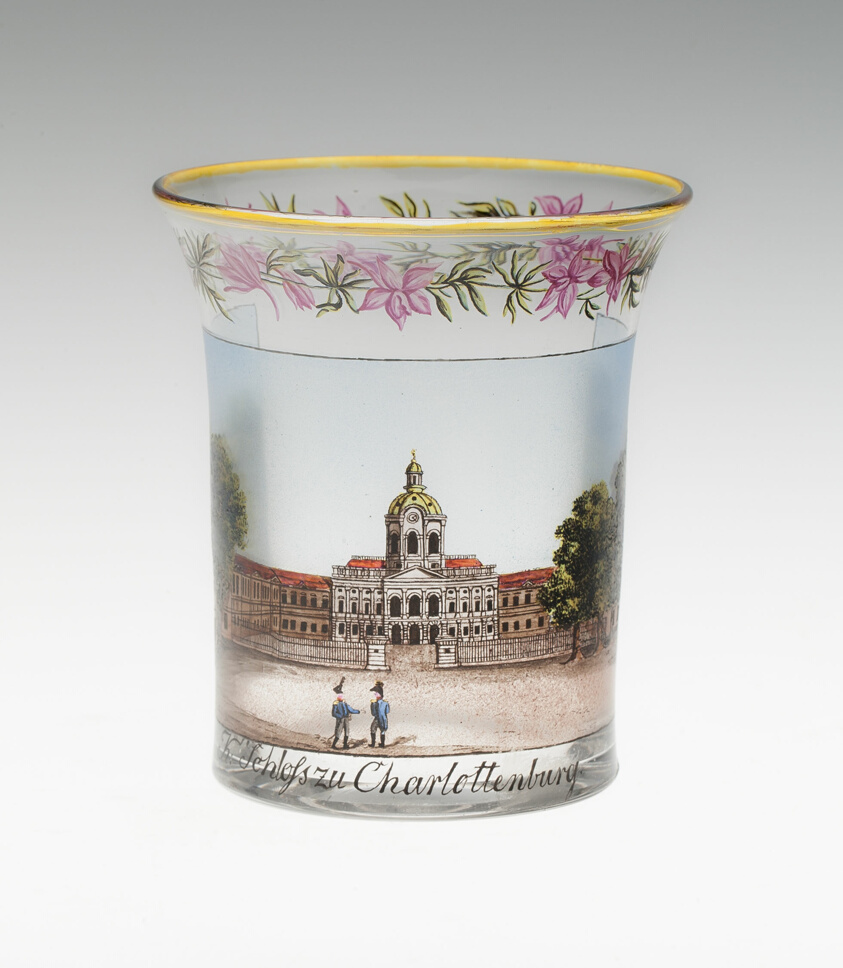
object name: Glass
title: Beaker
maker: Germany, Berlin or Dresden; Carl von Scheidt (German, 19th century)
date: 1816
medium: Glass; colorless, blown, cut, stained and enameled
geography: Berlin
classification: drinking vessel; glass; european decorative arts